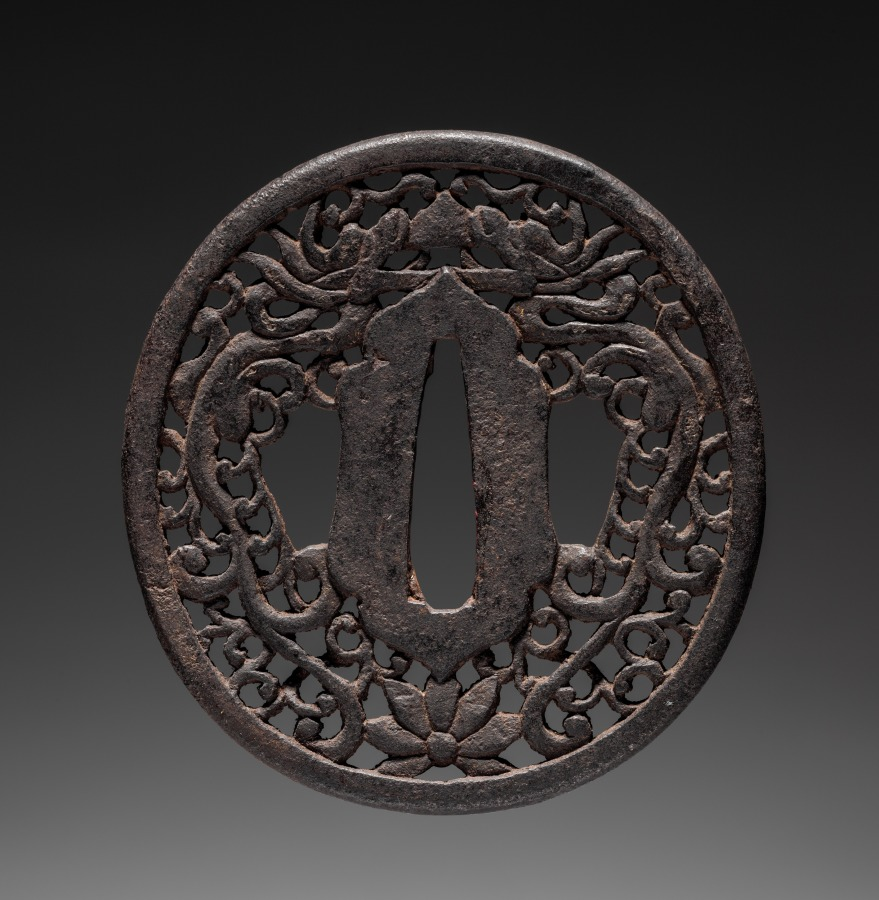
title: Sword Guard (Tsuba) with Dragons and Lotus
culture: Japan, possibly Edo period (1615-1868)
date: c. 1615–1868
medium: iron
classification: Arms and Armor